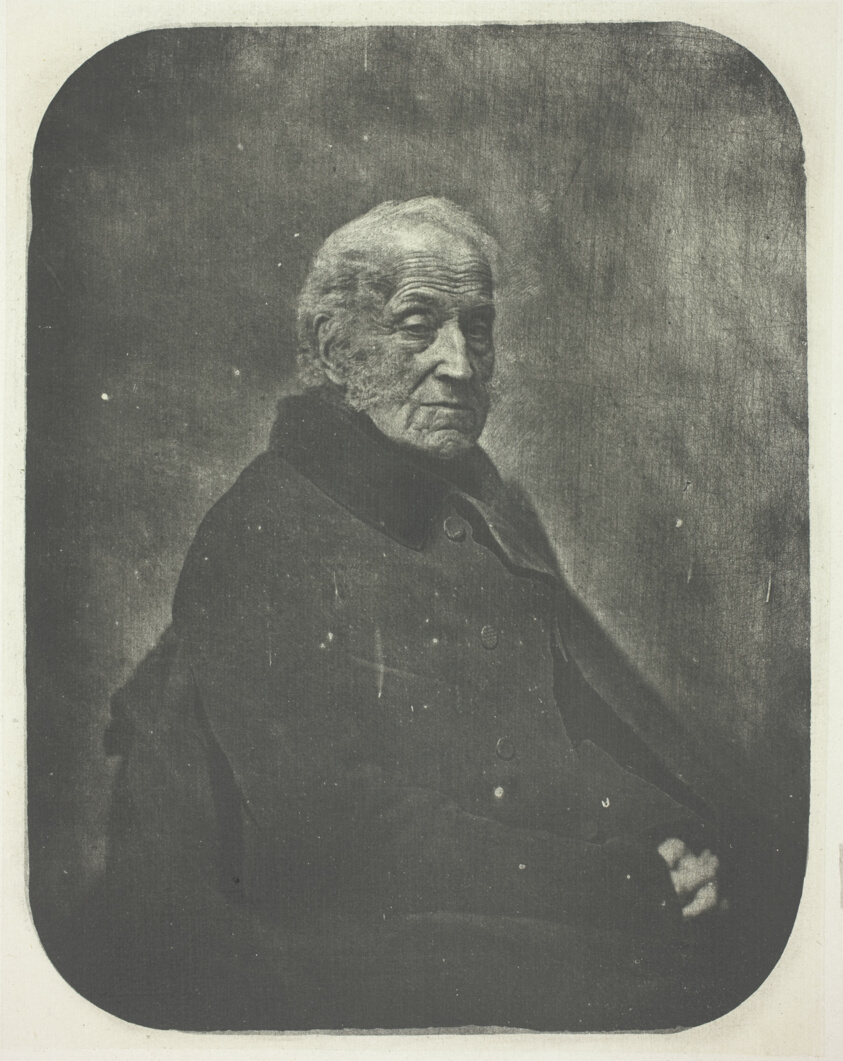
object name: Photograph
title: Portrait du Prince Adam Georges Czartorisky, d'apres Nadar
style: 19th century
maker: Charles Nègre (French, 1820–1880)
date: c. 1857, printed 1982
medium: Photogravure, from the portfolio Charles Negre: Treize Heliogravures, 1854–1857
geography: France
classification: photogravure; photomechanical process; photography; photograph